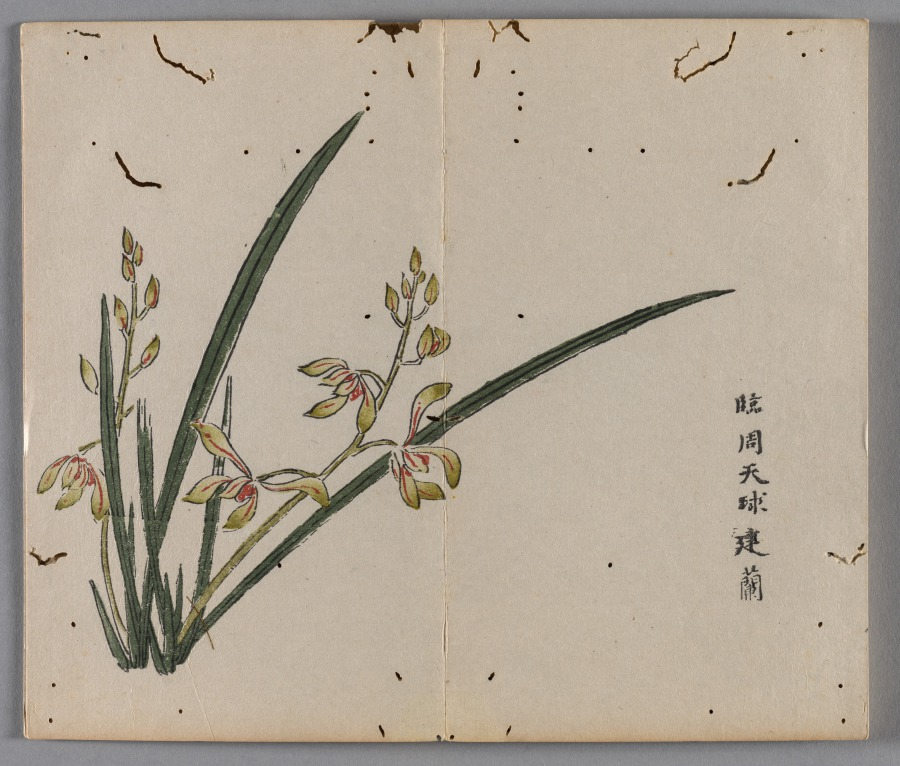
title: Ten Bamboo Studio Painting and Calligraphy Handbook (Shizhuzhai shuhua pu): Orchids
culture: China, Qing dynasty (1644-1911)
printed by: Hu Zhengyan (Chinese, c. 1584–1674)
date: 1633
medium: Woodblock-printed book; ink and colors on paper; first edition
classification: Print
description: Color printing reached a level of perfection in the early 1600s, as seen in this Ten Bamboo Studio Collection of Calligraphy and Painting and the Mustard Seed Garden Manual of Painting (printed 1679 and 1701). The painterly quality, precision in registering (aligning) the woodblocks, and harmonious colors made them the most successful color print editions in Chinese history. Both editions were printed and compiled in Nanjing, spread nationwide, and had a great impact on the arts in Japan and Korea.